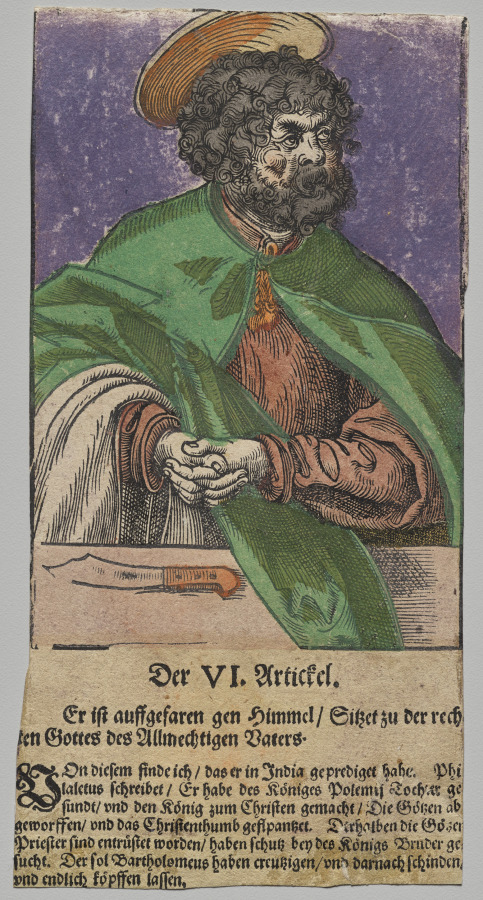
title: Bartholomew from Christ, the Apostles, and Saint Paul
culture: Germany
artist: Lucas Cranach the Elder, After (German, 1472–1553)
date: 1563/64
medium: Woodcut with letterpress text, hand colored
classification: Print